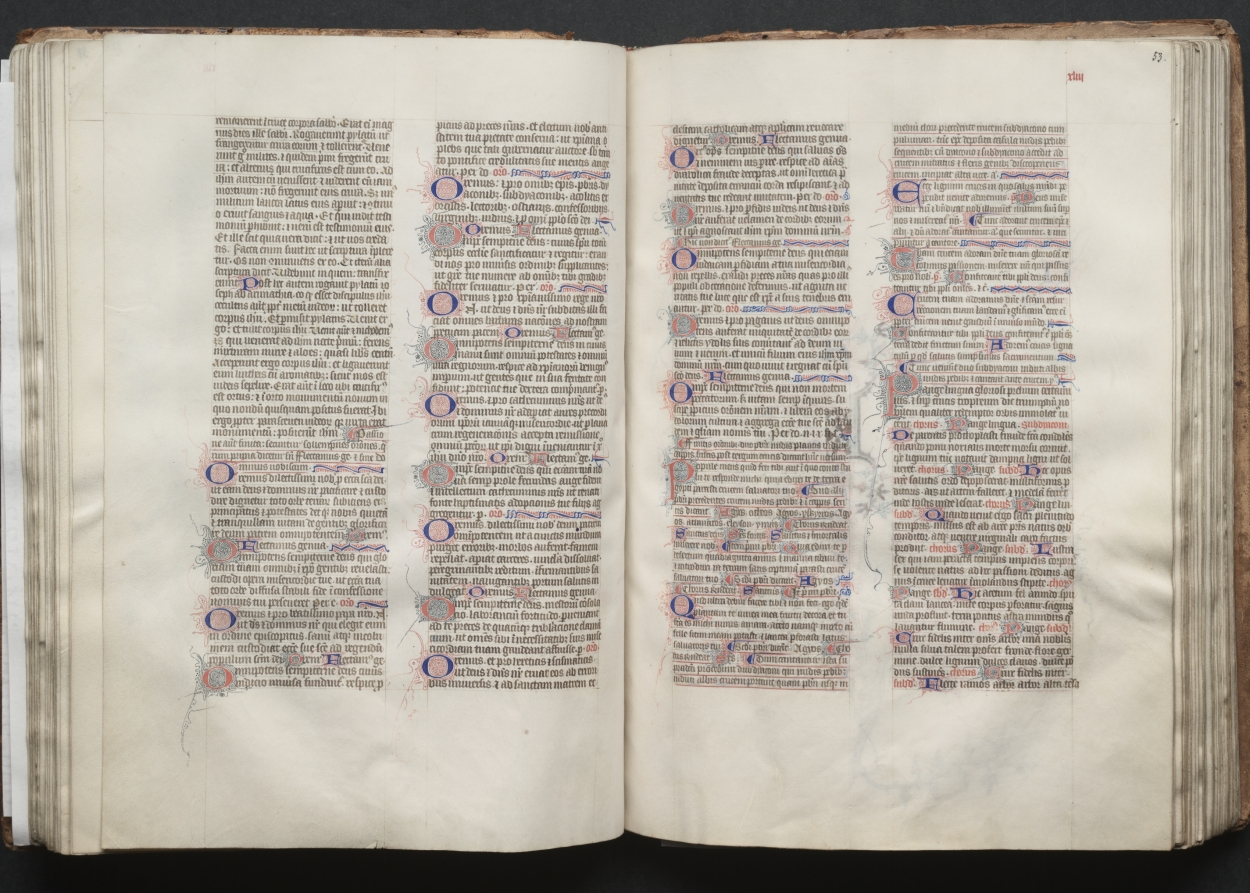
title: The Gotha Missal: Fol. 52v, Text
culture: France, Paris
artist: Master of the Boqueteaux (French)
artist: and Workshop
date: c. 1375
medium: ink, tempera, and gold on vellum; blind-tooled leather binding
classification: Bound Volume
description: The style and quality of this manuscript's decoration is typical of deluxe Parisian books made for aristocratic or royal patrons. Most of the book's decoration appears to be the work of the Master of the Boqueteaux, an artist active at the court of King Charles V (died 1380). His style was apparently shared by a number of book illuminators working in and around Paris. It is very possible that the Gotha Missal belonged to Charles V, but is not provable because the manuscript has no royal portraits and lacks a colophon. Given the book's magnificent decoration, however, it would seem that it was produced for a Valois prince, if not for the king himself. The manuscript receives its name from the German dukes of Gotha, its later owners.